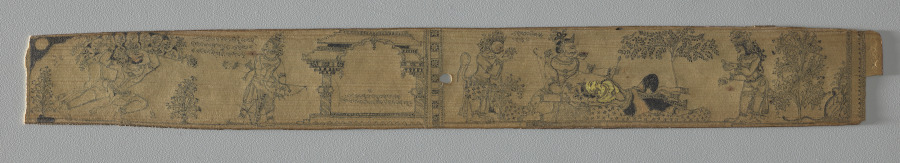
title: Hanuman Brings the Mountain of Healing Plants; Rama Extracts the Arrow from Lakshmana as Hanuman and a Bear Prepare to Treat Him (recto), from a Romance of Chandrabhanu and Lavanyavati of Upendra Bhanja (Indian, died 1740)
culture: Eastern India, Odisha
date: late 1700s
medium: gum tempera and charcoal on palm leaf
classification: Painting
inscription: on both recto and verso in Oriya